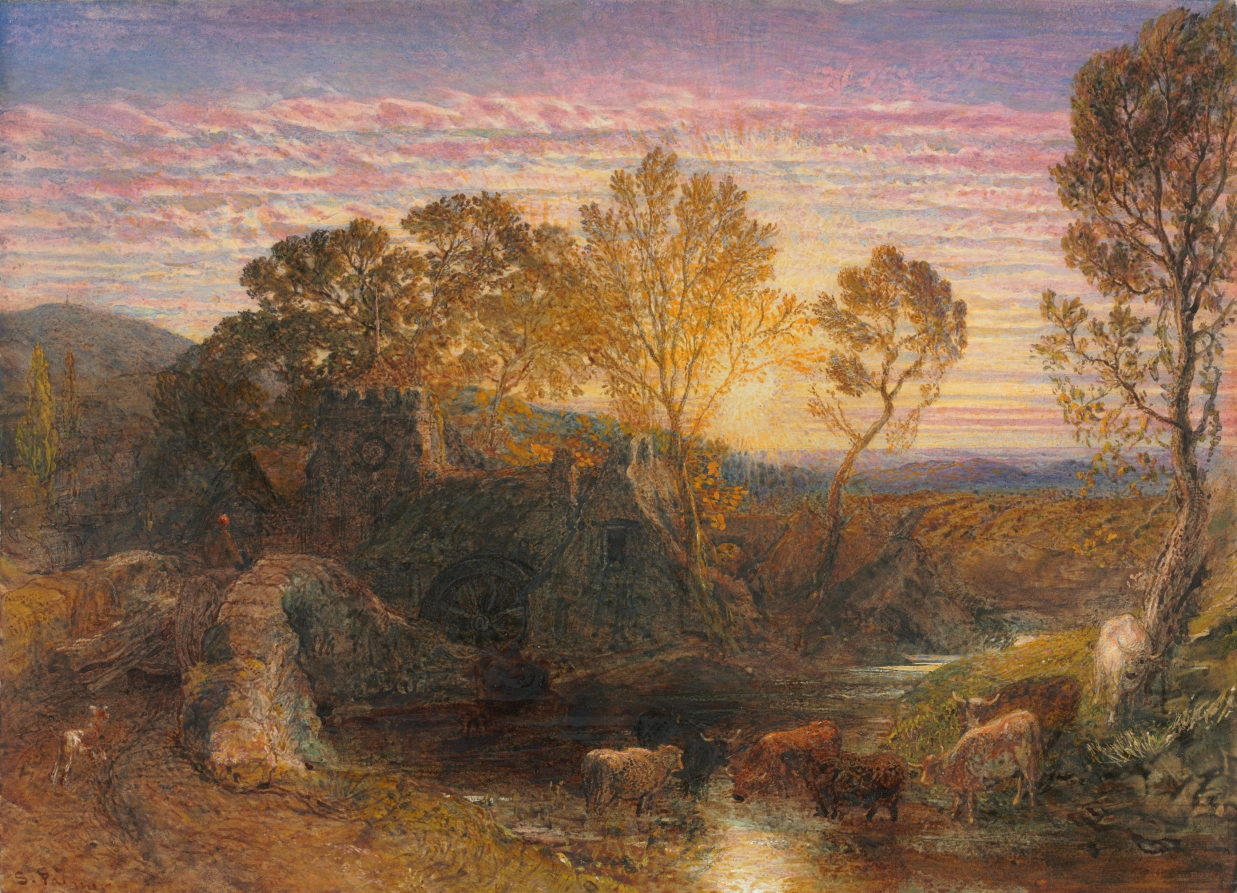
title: The Golden Hour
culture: England, 19th century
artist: Samuel Palmer (British, 1805–1881)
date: 1865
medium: watercolor and gouache with graphite and scraping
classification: Drawing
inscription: signed, in brown watercolor, at lower left: S. Palmer; inscribed, in graphite, on verso: Never let drawinsg on London Board be thinned by removing paper from the back. / This drawing would be unchanged after 3 centuries if the frame were in / a folding ["folding" crossed out] case with a door -- unnecessary exposure to light avoided. See Missals in B. Museum / SP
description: Samuel Palmer developed a personal and emotionally charged style of landscape painting that celebrated nature as the product of divine creation. This watercolor of a spectacularly colorful sunset over the hills of Surrey was painted by Palmer toward the end of his life. An autumn sky heavy with rows of cumulus clouds shimmers in a pattern of pink and amethyst, as slivers of golden light emanate from the setting sun. The idyllic landscape is an elegy not only to a passing day, but to the brevity of life itself.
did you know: Around the time this watercolor was made, Samuel Palmer began to focus primarily on naturalistic landscapes that he hoped would be commercially successful in order to contend with the practical responsibilities of married life and family.